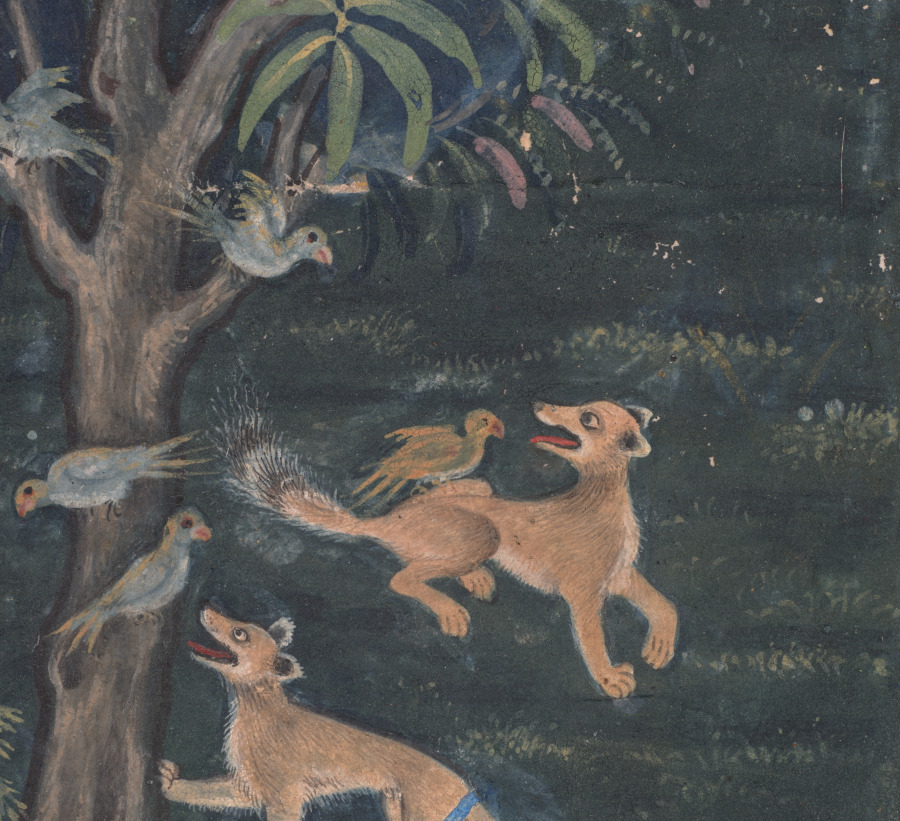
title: The parrot mother cautions her young on the danger of playing with foxes, from a Tuti-nama (Tales of a Parrot): Fifth Night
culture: Mughal India, court of Akbar (reigned 1556–1605)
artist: Dasavanta (Indian, d. 1584)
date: c. 1560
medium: gum tempera, ink, and gold on paper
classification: Painting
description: One night the parrot Tuti tells Khujasta that he hopes her relationship with her new lover does not wind up being only half-baked, like the medical treatment of the king of Kamarupa. She asks what that was about, and Tuti begins the story by telling of a mother parrot who lived in the forest with her young, who liked to play with the fox cubs who lived at the base of the tree. The mother parrot is perched on the edge of her treetop nest.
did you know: A fox cub suckles contentedly, as the mother keeps a sharp eye on the others.